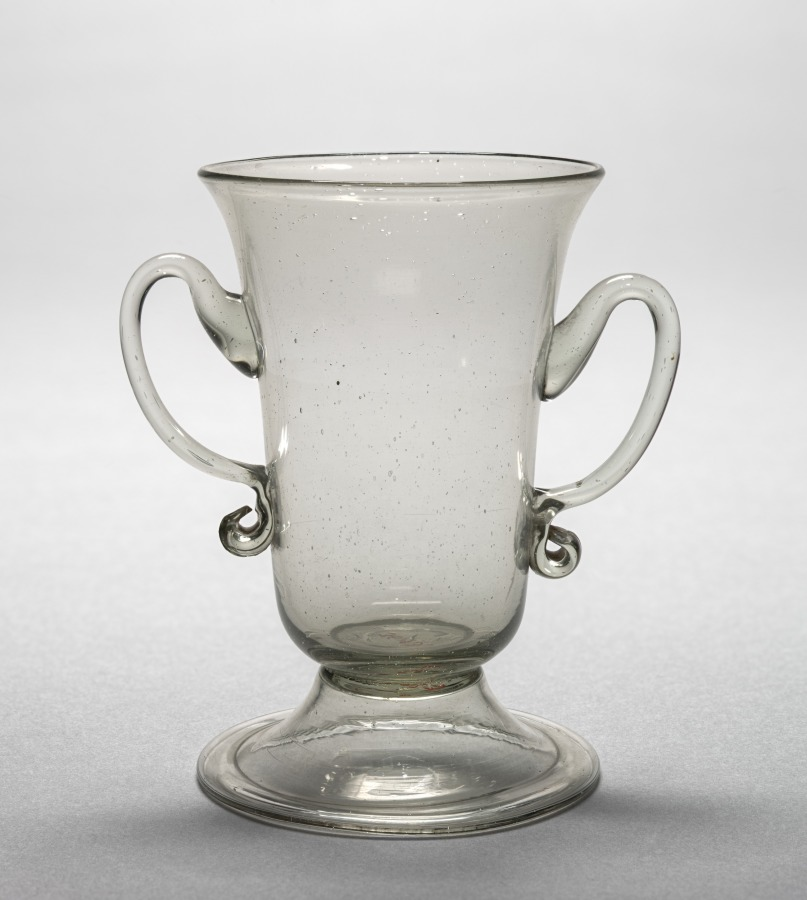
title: Syllabub Glass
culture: England, 18th century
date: c. 1720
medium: glass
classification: Glass